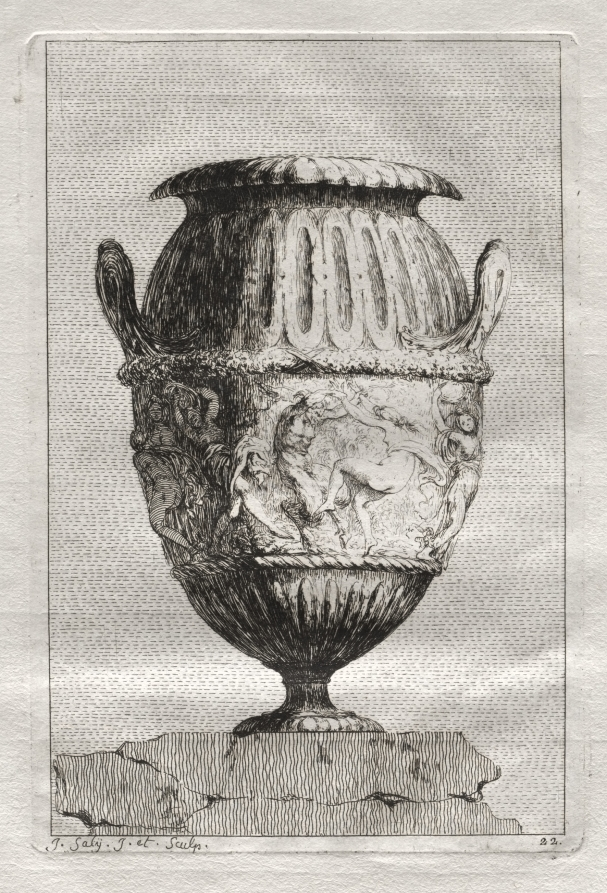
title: Suite of Vases: Plate 22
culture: France, 18th century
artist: Jacques François Saly (French, 1717–1776)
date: 1746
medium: etching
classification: Print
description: Jacques François Joseph Saly created an etched suite of 30 imaginary vase designs while studying in Rome. Throughout the series, he let his skill and imagination run wild on the theme of bacchants by inventively incorporating animals, satyrs, and maenads—as well as faces and grotesques (fantastic figures and beasts)—into various designs. Published in Paris, the series nourished an appetite for the revival of mythological and classical elements in decorative arts, and may have also inspired Jean-Honoré Fragonard’s suite of bacchanalia images.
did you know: The shape of this vase mimics the ancient Greek krater, a vessel that was used for mixing wine with water.